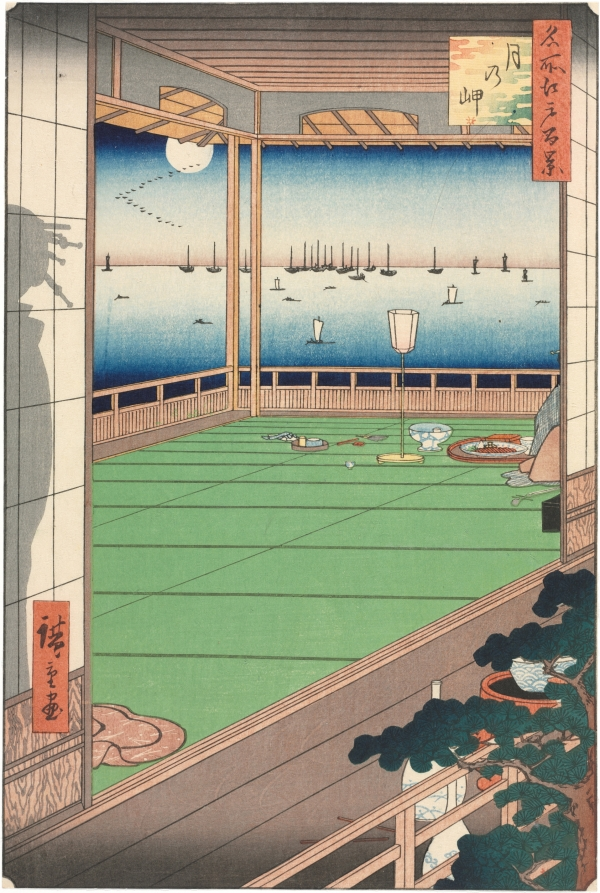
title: The Moon-Viewing Promontory, from One Hundred Views of Famous Places in Edo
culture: Japan, Edo period (1615–1868)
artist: Utagawa Hiroshige (Japanese, 1797–1858)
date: 1857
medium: color woodblock print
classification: Print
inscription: Signature: Hiroshige ga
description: Here, Utagawa Hiroshige’s design places the viewer by pine trees, peering beyond a doorway at the end of a moon-viewing party. The silhouette of a figure with an elaborate hairstyle is visible through a translucent paper door; only the person’s hem trails into view. Another individual remains seated on the floor in the upper right, near a musical instrument and a tray with blue-and-white ceramics, possibly still admiring the autumn moon over ships in Edo (now Tokyo) Bay.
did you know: Beginning in the 700s, the Japanese held moon-viewing parties in celebration of the full moon during the late summer and autumn months. A full moon is visible in this print.